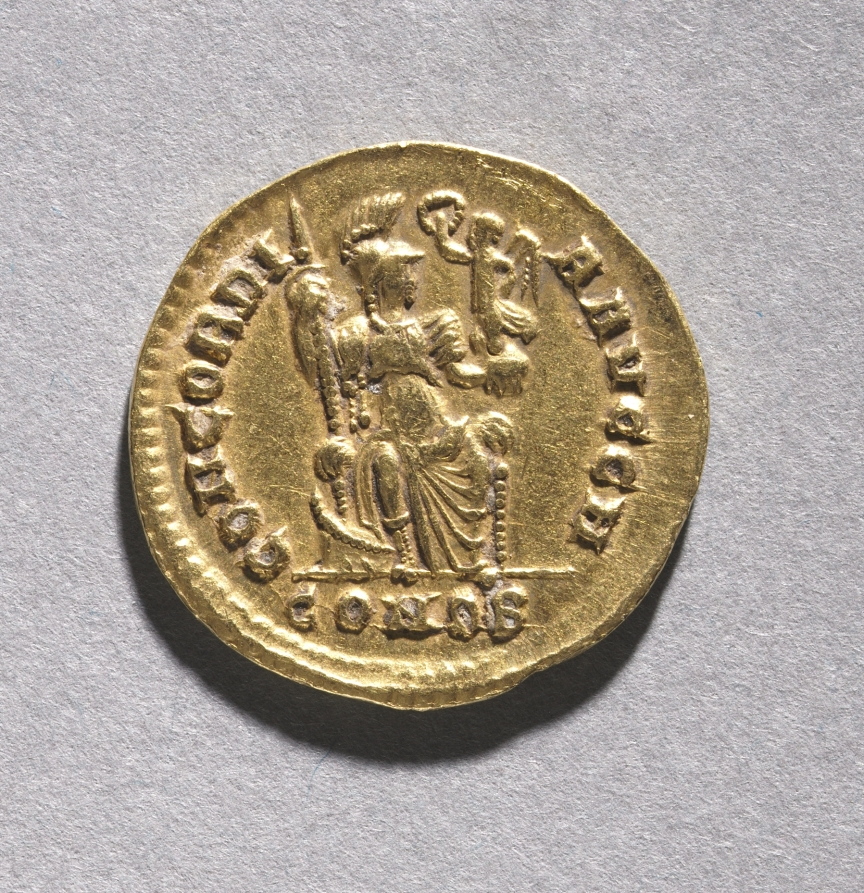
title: Tremissis of Honorius (reverse)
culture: Byzantium, Ravenna, Byzantine period, late 4th-early 5th century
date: 395–423 CE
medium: gold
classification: Coins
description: Byzantine Gold Coins The vast number of surviving Byzantine coins attests to the level of trade across the empire. Controlled and supervised by the emperor, the producers of coins took care to represent his authority and reflect his stature. Talented artists were recruited to engrave the dies (molds) used for the striking of coins. Emperors increasingly came to include their heirs and co-emperors on their coinage, as well as other family members or even earlier rulers. Coins were recognized, then as now, as small, portable works of art. With their inscriptions and images, Byzantine coins provide valuable documentation of historical events and a record of the physical appearance of the emperors. The coins shown here include the solidus, the basic gold coin of 24 karats; the tremissis, a gold coin of one-third the weight and value of the solidus; and the nomisma, which in the 10th century replaced the solidus as the standard gold coin.